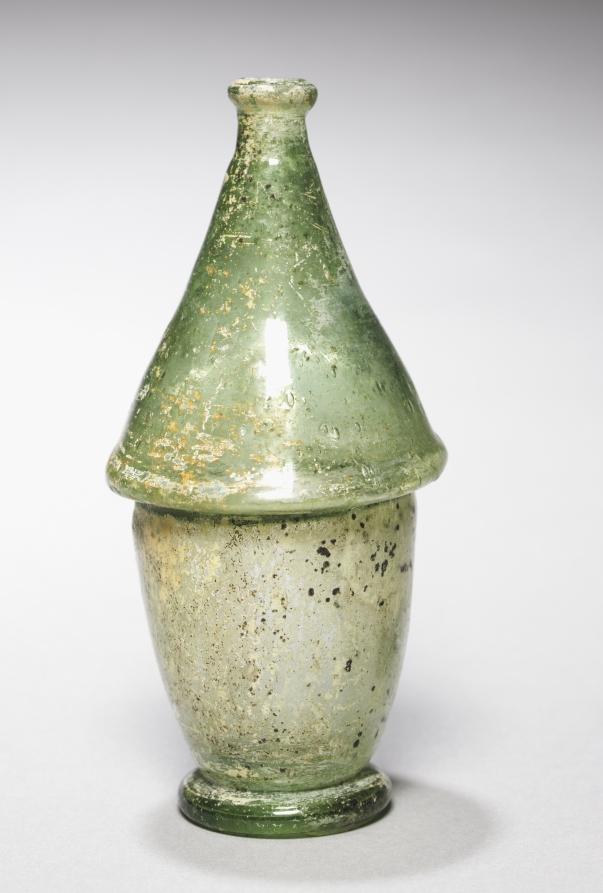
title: Double-Conical Bottle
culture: Germany, late 15th-early 16th century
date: c. 1500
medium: green glass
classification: Glass